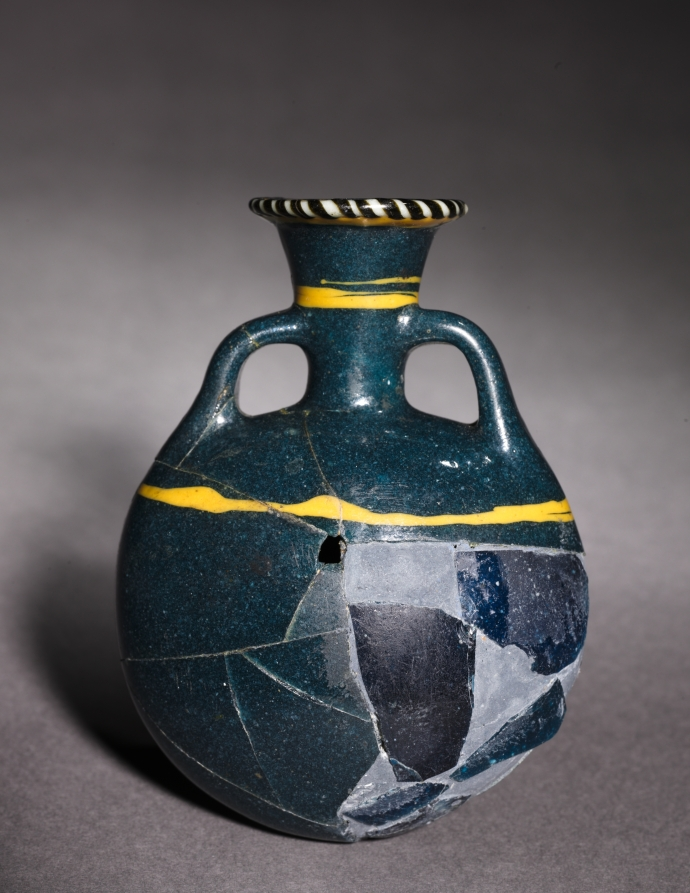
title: Lentoid Flask (Pilgrim Flask)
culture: Egypt, New Kingdom (1540–1069 BCE), Dynasties 18–19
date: c. 1336–1186 BCE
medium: glass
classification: Vessels